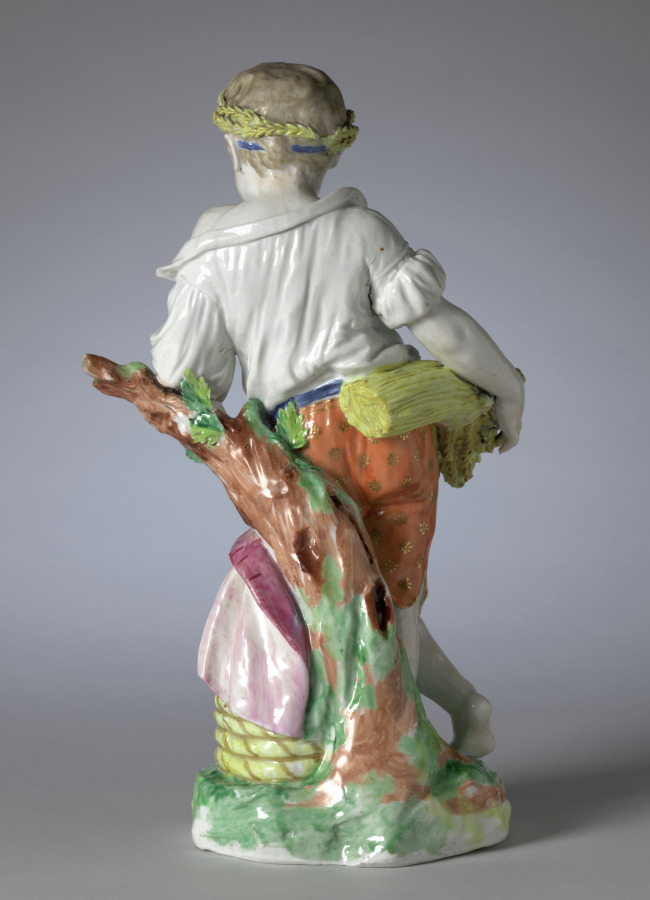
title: Figure of Summer from the Four Seasons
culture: England, Bristol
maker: Bristol Porcelain Factory (British, 1770–81)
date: c. 1775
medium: hard-paste porcelain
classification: Ceramic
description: The modern notion of childhood as a time of innocence and simplicity emerged during the second half of the eighteenth century. This understanding of adolescence led to numerous depictions of children as personifications of the four seasons. Here summer is portrayed as a young boy holding a sheaf of wheat as he leans against the beehive next to him. Both grain and honey have been associated with summer harvests and their accompanying festivals since antiquity.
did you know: Allegorical figures most often decorated a table during the dessert course, providing amusing subjects for conversation.